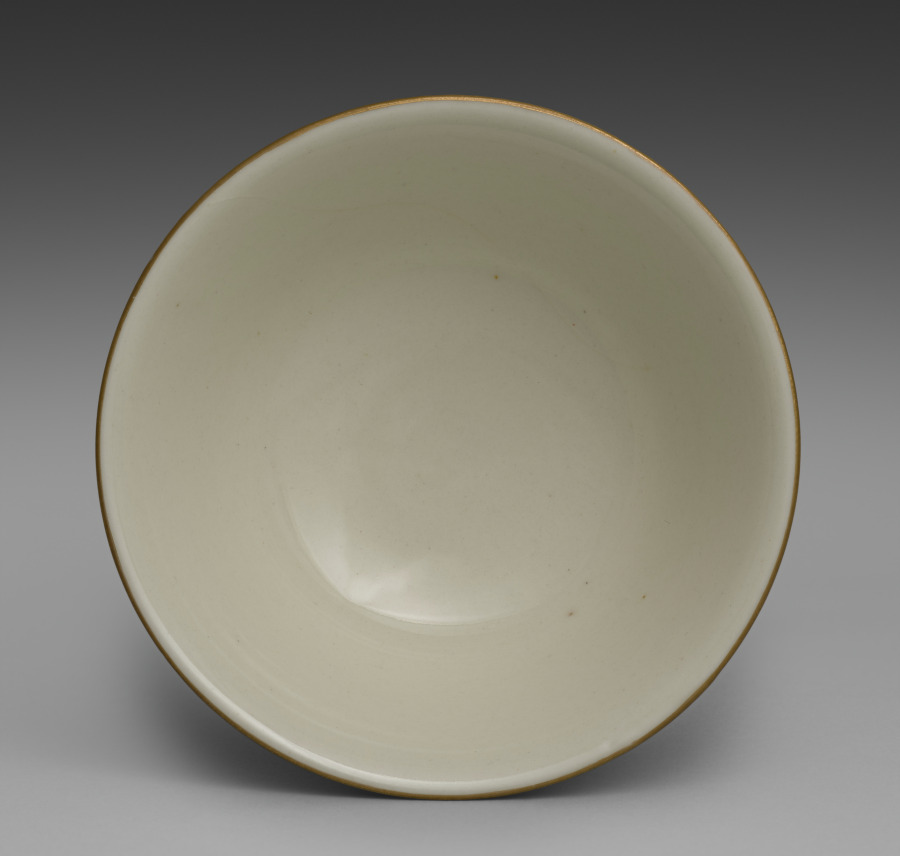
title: Bowl from Dining Set with Plum Blossoms and Cracked-Ice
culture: Japan, Meiji period (1868–1912)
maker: Seifū Yohei II (Japanese, 1844–1878)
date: c. 1875–78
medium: Porcelain with molded designs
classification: Ceramic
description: Each item in this set has a delicate low-relief design of flowering plum branches over scattered, intersecting lines meant to resemble the cracked-ice surface of a frozen body of water and is signed on the base in gold pigment. While Yohei II produced many fine works in underglaze blue, like those produced by Kiyomizu Shichibei, he also made works in quite different styles later in his career, from the early 1870 s. In 1873, he was appointed purveyor to the Industrial Center of Kyoto Prefecture, a designation associated with Kyoto’s efforts to reach an international market through the port of Kobe; and from 1875 until his death, he was involved in national-level projects to present Japanese ceramics across the world. It was during this period that Yohei III was apprenticed to Yohei II, and it has been suggested that this set may in fact be an early example of Yohei III’s work, which he signed with his teacher’s name. Decorated with flowers resembling Japanese textile motifs, the set calls to mind the design of Yohei II’s pair of vases with plum blossoms in the Victoria and Albert Museum. Here, the elaborate trees created for a formal public exhibition setting have been translated into the approachable blossoms of the genteel domestic environment. While the designs are consistent across the pieces, each raised flower petal and pistil and each incised line in the ice was done by hand, so the cups, bowls, and dishes are similar yet unique. The bottoms of two boxes once identified the set’s owner, but the information has been deliberately obscured with black ink. However, inscriptions still visible appear to indicate two occasions, once at the end of July 1886 , and once again in June 1916 , when parts of the set were requested from Hokura in Niigata Prefecture. The location corresponds to a neighborhood in the present-day city of Jōetsu. The surname Tsuji 辻 also appears on a paper tag affixed to one of the box cloths. Future research may possibly reveal more about their provenance. A vase by Yohei III in a private collection combines the formal grandeur of the Yohei II vases in the Victoria and Albert Museum with the gentler design of this dining set, placing flowering plum trees against soft, scalloped-edge clouds resembling those in golden screens.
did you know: The dining wares have a creamy white coloration that the four boxes containing them identify as Korean in style.